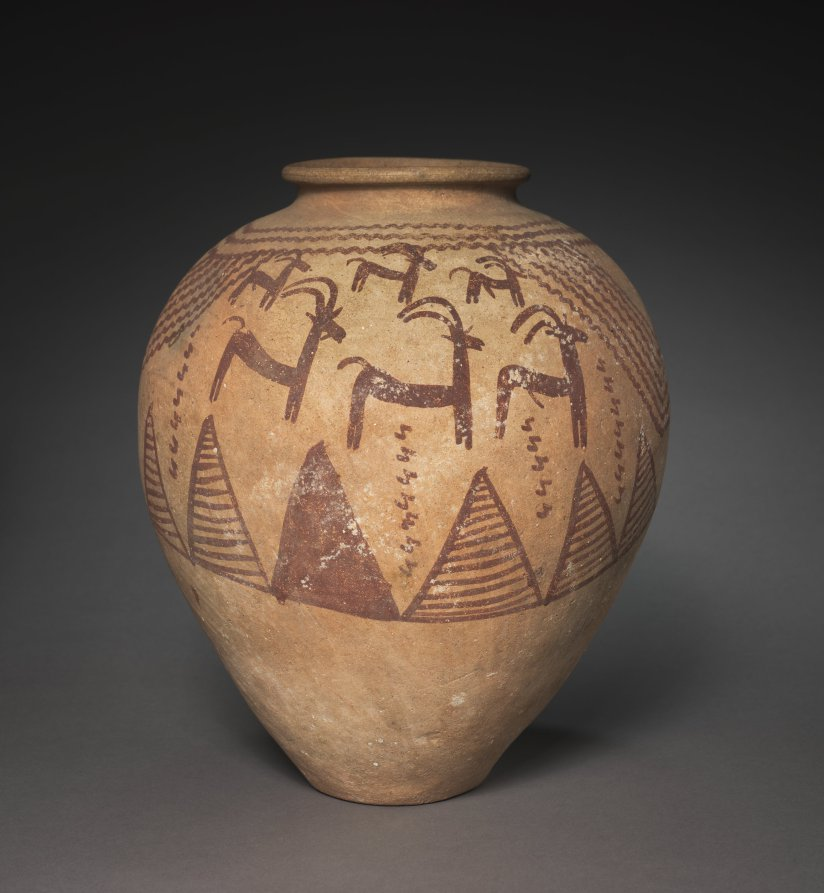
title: Storage Jar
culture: Egypt, Predynastic (5000–2950 BCE), Naqada III (3200–3000 BCE) jar, with modern painted decoration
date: 3100–2950 BCE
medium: marl clay ware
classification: Vessels